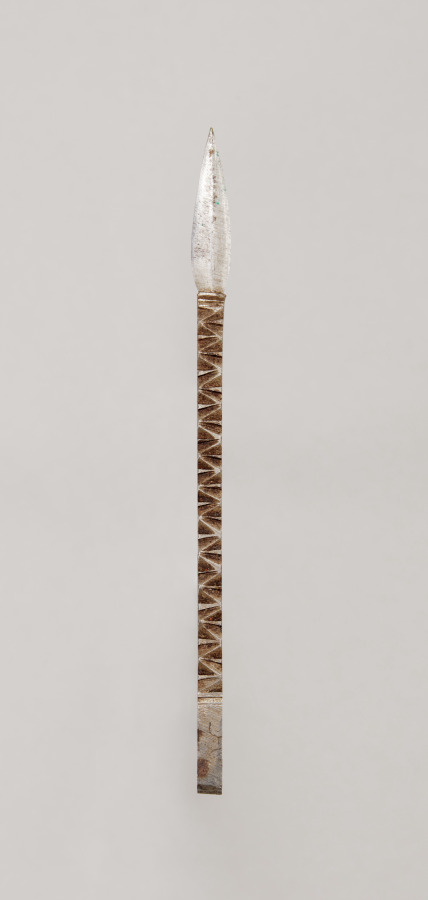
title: Scabbard Spear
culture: Africa, East Africa, Sudan, unknown maker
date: 1880–1910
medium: metal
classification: Arms and Armor